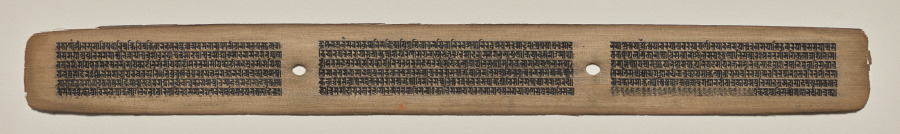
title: Text, Folio 59 (recto), from a Manuscript of the Perfection of Wisdom in Eight Thousand Lines (Ashtasahasrika Prajnaparamita-sutra)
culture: Eastern India, Bihar, Vikramashila Monastery. Painting: Nepal, Kathmandu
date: Sunday, September 14, 1119 (year 239 of the Newar Samvat in the month of Ashvina)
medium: gum tempera and ink on palm leaves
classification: Painting